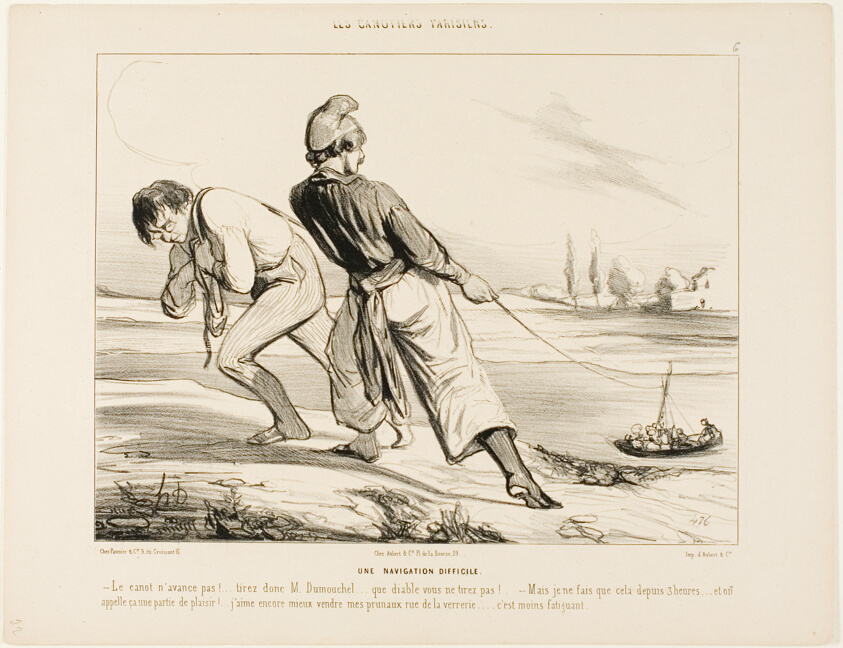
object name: Print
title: A Difficult Navigation. “- The boat doesn't move! Pull Dumouchel, pull.... why the devil don't you pull! - But I am doing nothing else than that for the last three hours!.... and this is called a pleasure trip! I'd rather sell my prunes in rue de la Verrerie.... that's less tiring!,” plate 6 from Les Canotiers Parisiens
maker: Honoré Victorin Daumier; French, 1808-1879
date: 1843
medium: Lithograph in black on buff wove paper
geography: France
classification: lithograph; print; prints and drawing